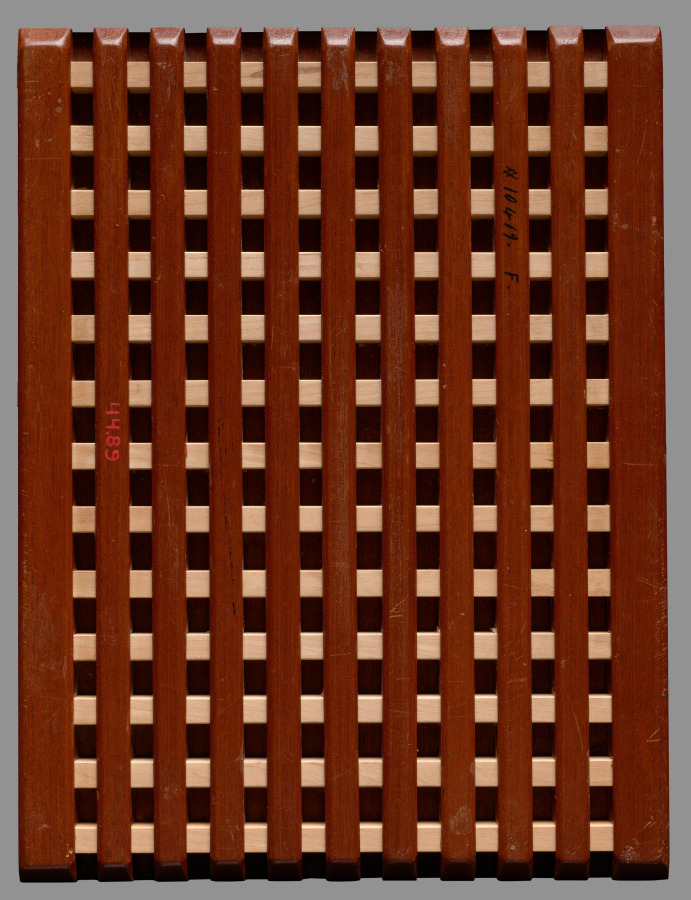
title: Virgin and Child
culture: Italy, late 15th Century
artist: Pintoricchio (Italian, c. 1454–1513)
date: c. 1490–1500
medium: tempera and oil on wood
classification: Painting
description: Bernardino di Betto, called Pinturicchio, is said to have acquired his nickname ("little painter") because of his small stature, and used it to sign some of his paintings. Born in Perugia, the provincial capital of Umbria, he trained under local artists, eventually becoming a paid assistant of the painter Perugino. He is known to have assisted Perugino on his frescoes in the Sistine Chapel and eventually established his own reputation as a respected artist. Many of his commissions were for churches and wealthy families in Umbria and elsewhere. Though the source of this painting is unknown, it was likely produced for a home or private chapel.